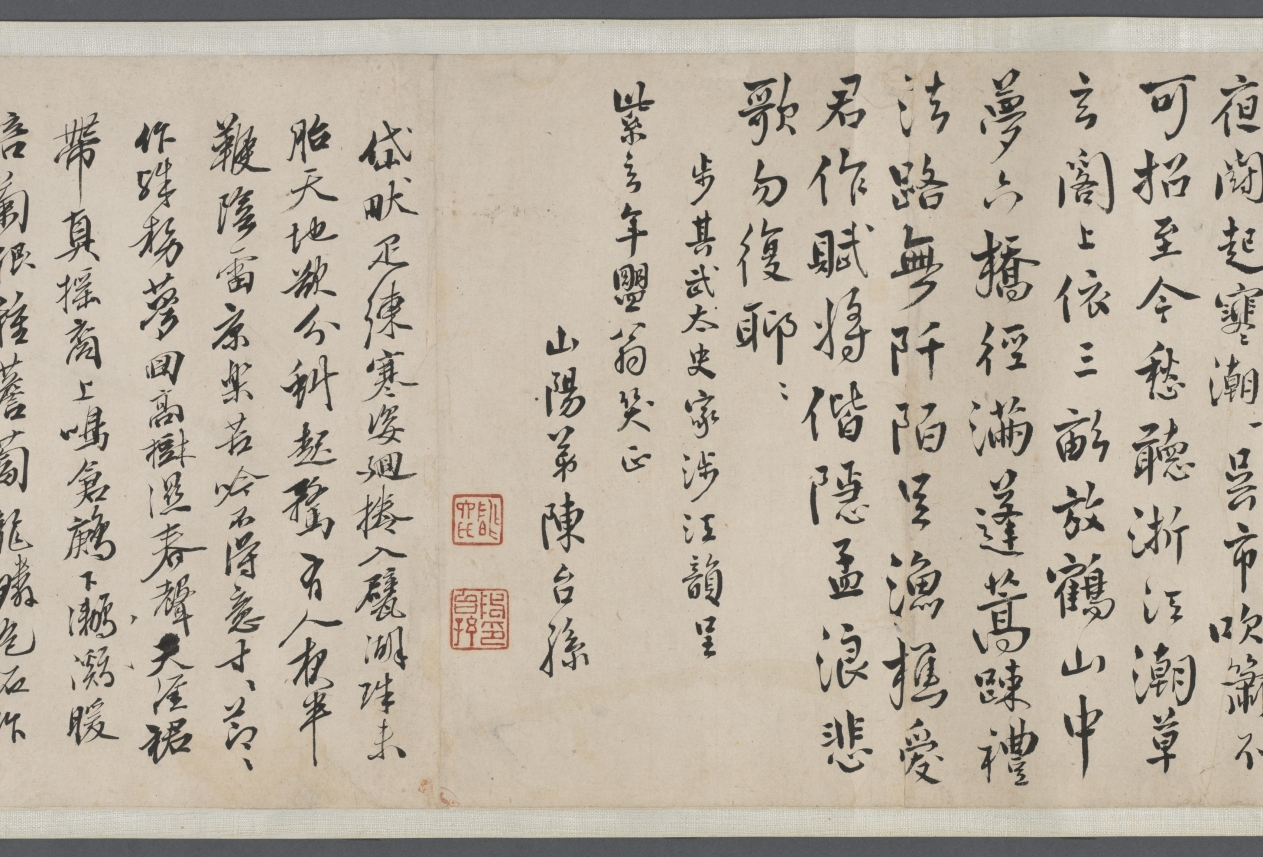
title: Spring Rain Thatched Hut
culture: China, Qing dynasty (1644-1911)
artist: Wang Jianzhang (Chinese, active 1621–1662)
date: 1650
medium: handscroll, ink on paper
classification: Drawing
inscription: Title by Wu Zhiying 吳芝瑛 (1868–1933), dated 1910.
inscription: 春雨草堂圖。庚寅仲春，為紫玄社兄畫於若耶溪上。 仲初王建章。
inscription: 12 colophons by Gong Weiliu’s 宮偉鏐 (1611–1680) contemporaries: Fang Gongqian 方拱乾 (1596–1667, jinshi of 1628); Jiang Cai 姜埰 (1607–1673); Liang Yizhang 梁以樟 (1608–1665); Du Shaokai 杜紹凱 (also named Du Jie 杜岕, 1617–after 1689), dated 1648; Zhao Kaixin 趙開心 (d. 1663), dated 1647; Zhao Erbian 趙而忭 (d. 1658); Yu Yaoguang 余耀光, dated 1649; Yao Quan 姚佺, dated 1648; Chen Taisun 陳台孫 (b. 1611, jinshi of 1640); (Monk) Shao 韶; Du Zhujin 杜祝進; and Tang Shi 唐時.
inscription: 此研田莊居士王建章為先太史紫元公所作春雨草堂圖也。居士字仲初，明崇禎間人，與先太史及惲香山相友善。喜畫佛像，自謂不讓李公麟。山水祖述董源，筆力雄健，有不可羈勒之概。香山稱其墨有五采，非世人所知。然性廉重，非同志不輕落筆，人得其寸圖尺縑，必相與忻賞，如獲蜼彝兕敦，非人世間物也！見先太史筆記，此圖寫雨景，而氣韻生動，勃勃於不能止。每一展覽，覺滿紙雲烟，墨瀋猶濕，如寫吾先人胸中未盡之邱壑也。圖後題詠，多一時名手，想見文采風流之盛。迄今二百餘年，舊德先疇，遺風未沫。吾子孫其永寶之，如與吾先人接謦咳於一堂，為感思之助，其敢作圖畫觀乎！同時香山亦有圖佚去己久，不知異日能為延津之合否。壬申長夏本昂重裝敬識。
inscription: Collectors' seals including: Gong Ben'ang 宮本昂 (1821–1874); Lian Qian 廉泉 (1868–1932); Wu Zhiying 吳芝瑛 (1868–1933)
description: With its striking simplicity, this painting captures the pure serenity of a private garden in the moist atmosphere of a spring morning on a small river. Painted in the style of Ni Zan, Wang Jianzhang dedicated this work to his patron-friend Gong Weiliu (1611-1680). Gong retired from government service after the fall of the Ming dynasty and constructed a garden-retreat at his native home in Taizhou, Jiangsu province. He invited scholars and poets from his literary society to contribute writings of his estate, which are here mounted together with the painting in this scroll.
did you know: Gong Weiliu, the owner of the estate portrayed here, had received his prestigious jinshi degree in 1643, but his official career was thwarted by the collapse of the Ming dynasty the following year.